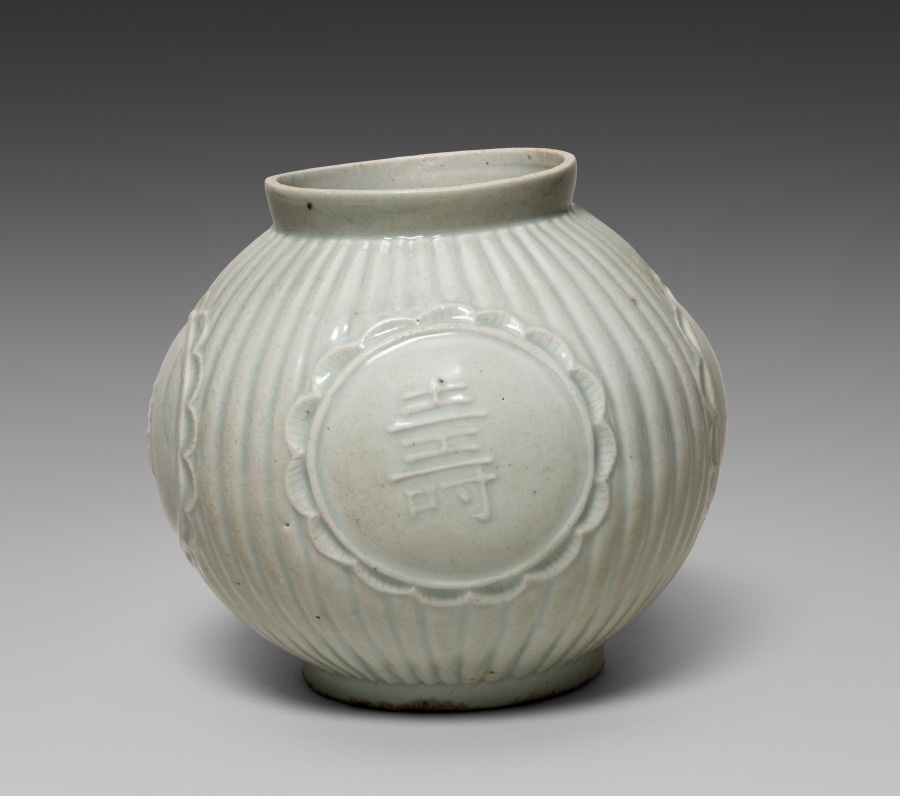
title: Jar with Four Auspicious Characters in Relief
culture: Korea, Joseon dynasty (1392–1910)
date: 1800s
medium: glazed porcelain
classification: Ceramic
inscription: longevity 壽, happiness 福, health 康, and peace 寧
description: This white porcelain vase is decorated with four Chinese characters symbolizing auspicious (hopeful) wishes—longevity, good fortune, health, and peace—each within a floral medallion. Such jars were often presented as birthday or wedding gifts, conveying the giver’s blessings for a long and harmonious life. This object was purchased in 1981 from Kochukyo (壺中居), an antique gallery founded in 1924 in Tokyo, Japan. Many important Korean works remain in Japanese private collections, after being taken there during the Japanese colonial period (1910–45). Consequently, Japanese antique galleries continue to handle Korean antiquities, serving as significant channels for their circulation today.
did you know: This type of jar with auspicious characters was often used as a birthday or wedding gift.